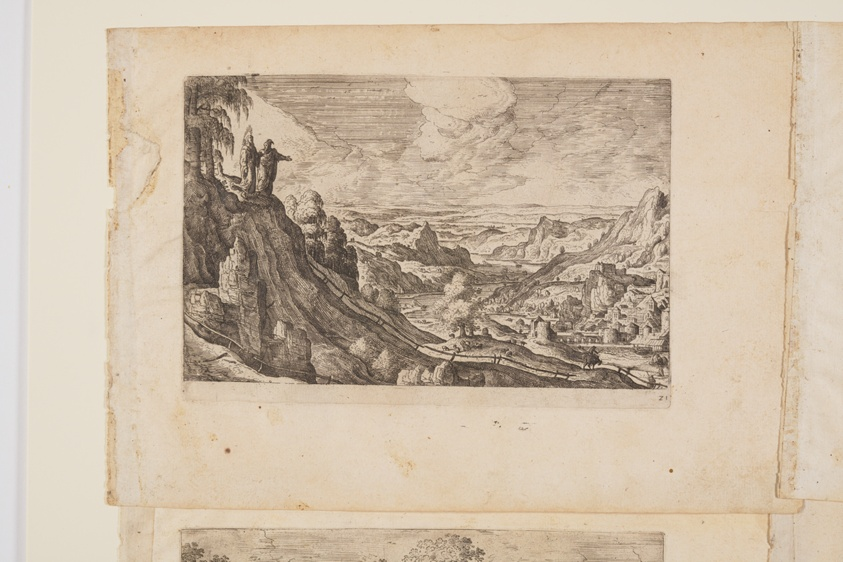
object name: Print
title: Plate 21, from Landscapes with Scenes from the Old and New Testament and Ovid’s Metamorphoses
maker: Hans Bol (Flemish, 1534–1593); published by Philip Galle (Flemish, 1537–1612)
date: 1574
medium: Etching on ivory laid paper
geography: Flanders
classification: print; paper; prints and drawing; etching